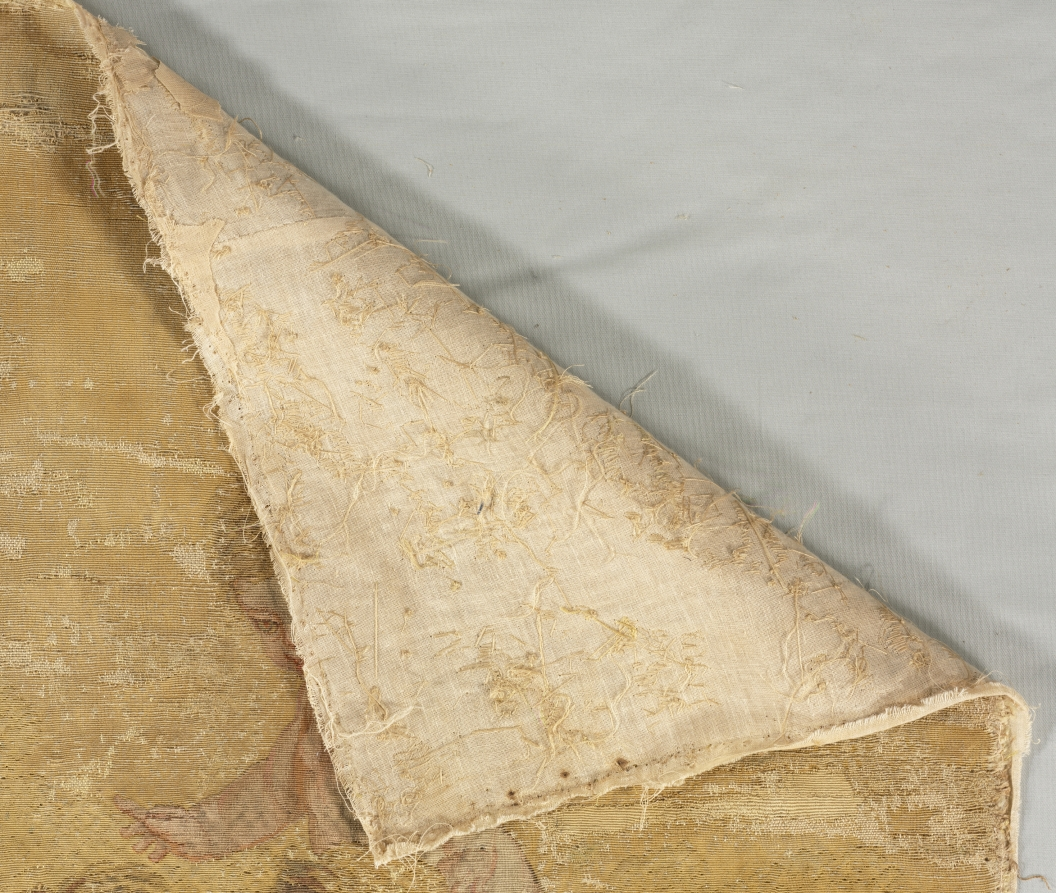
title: Children Playing: The Bath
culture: France, Beauvais, 18th century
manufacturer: workshop of Charron (French)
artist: after a design by François Boucher (French, 1703–1770)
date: 1700s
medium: tapestry weave: silk and wool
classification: Tapestry